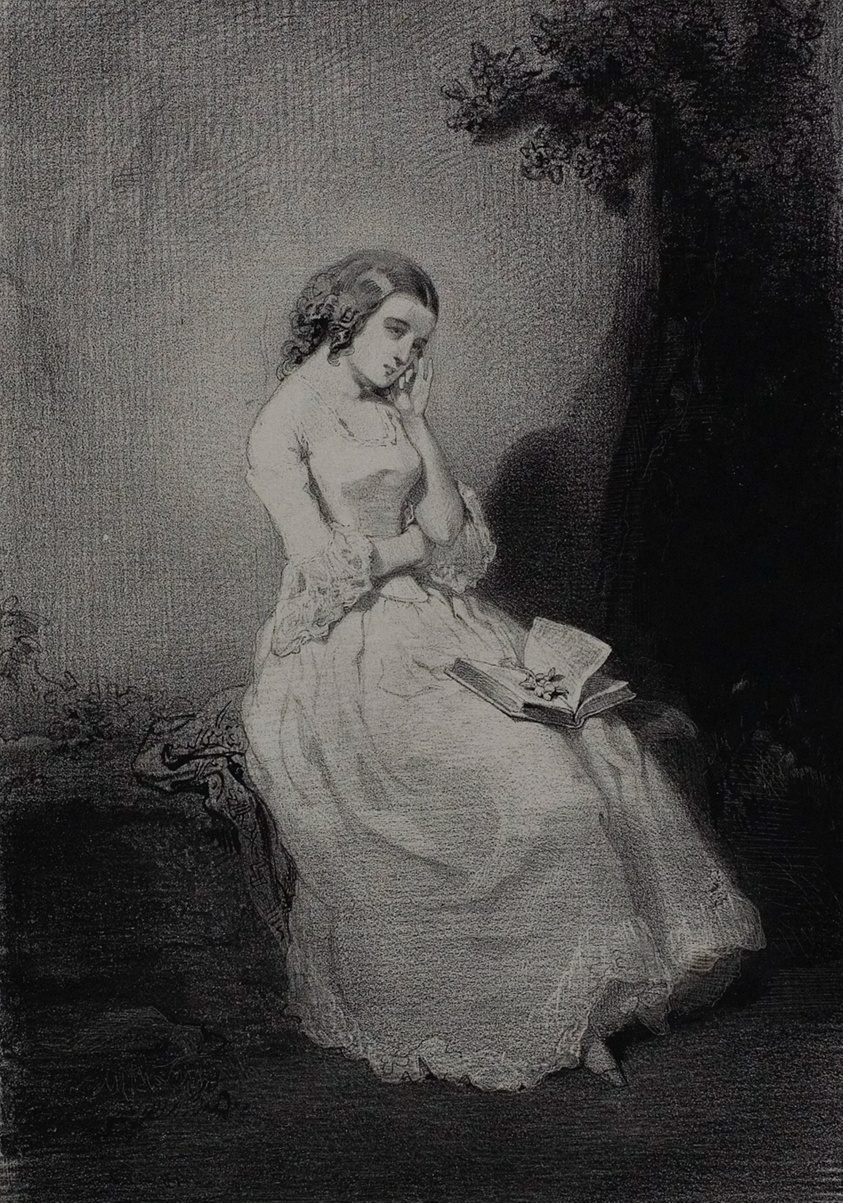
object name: Print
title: The Commentary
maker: Paul Gavarni (French, 1804-1866)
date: 1843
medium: Lithograph in black on ivory China paper, laid down on cream wove paper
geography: France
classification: lithograph; print; prints and drawing